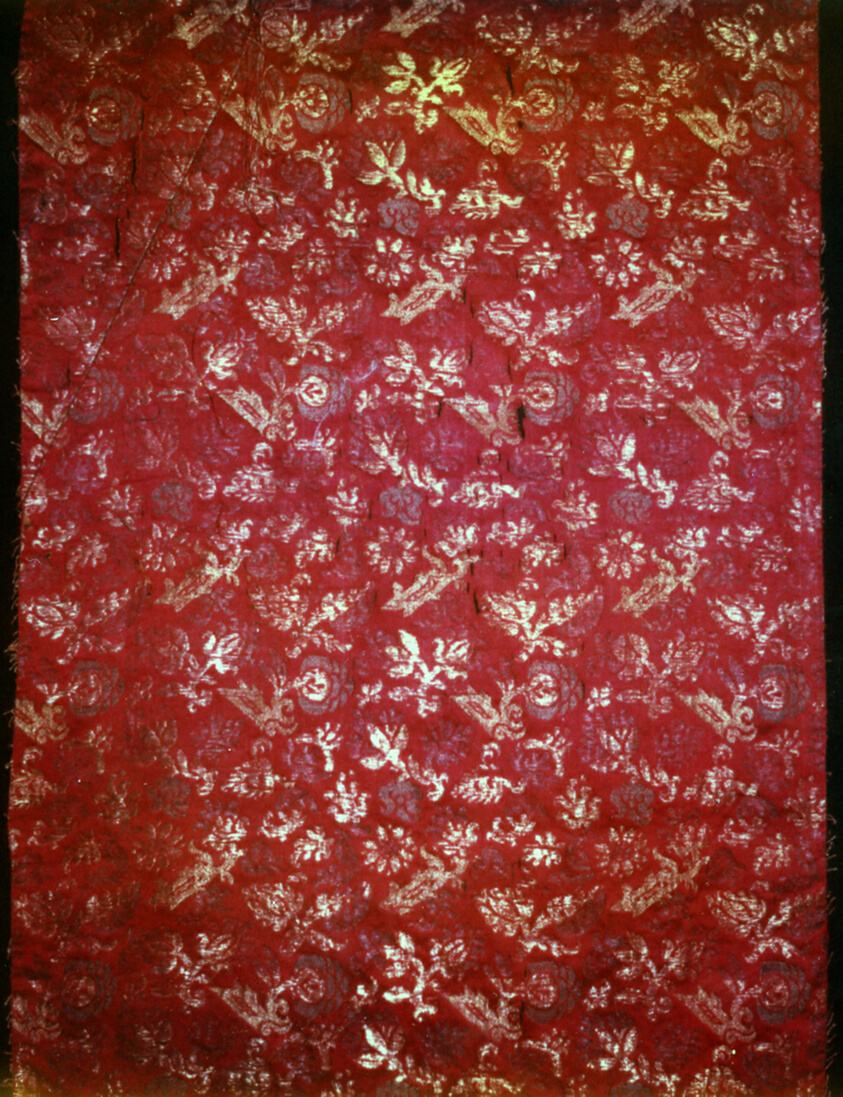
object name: Textile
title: Panel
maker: Italy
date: 1575/1600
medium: Silk and gilt- and silvered-metal-strip-wrapped silk, warp-float faced 7:1 satin weave with supplementary brocading wefts bound in weft-float faced 1:3 twill interlacings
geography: Italy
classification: textile; weaving; weaving - velvet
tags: fruit, flowers, foliage